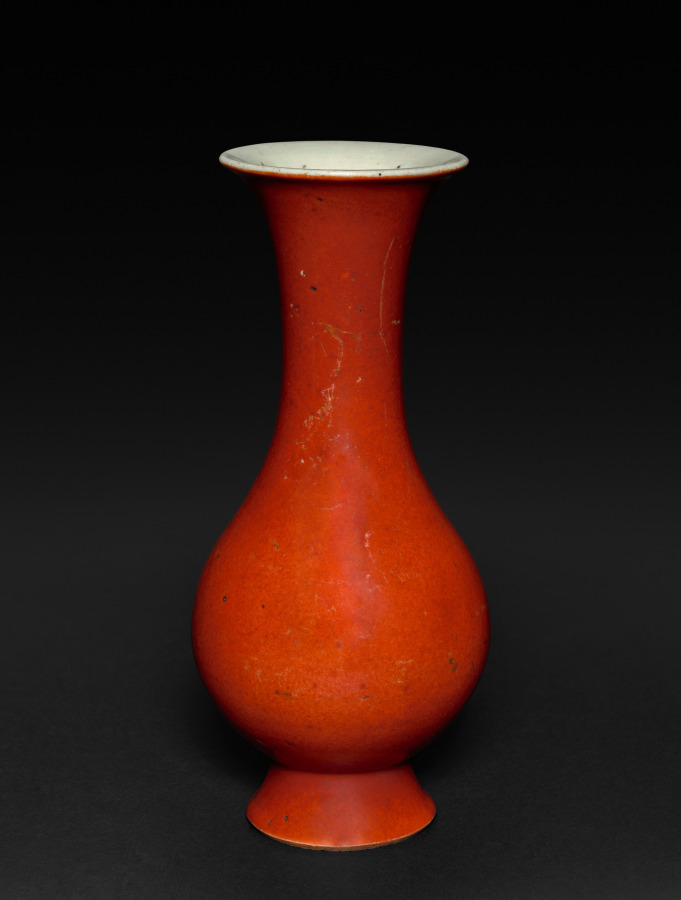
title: Vase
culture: China, Jiangxi Province, Jingdezhen kilns, Qing dynasty (1644–1911), Yongzheng reign (1722–35)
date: 1723–35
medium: porcelain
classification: Ceramic